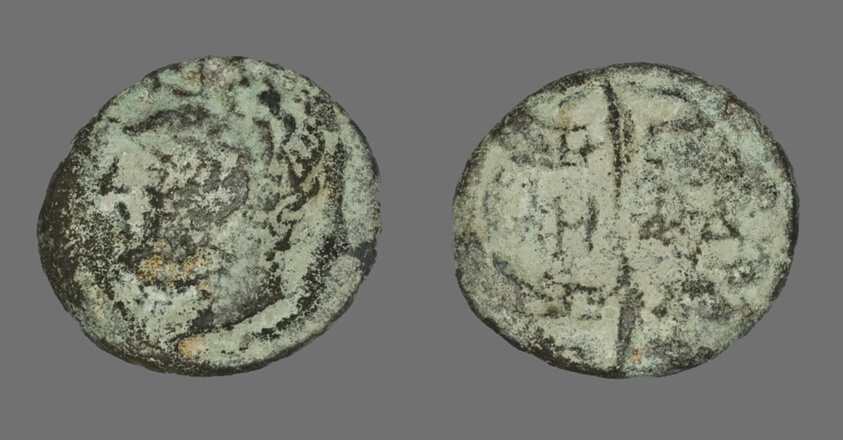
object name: Coin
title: Coin Depicting a Male Head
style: greek, ancient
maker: Greek, minted in Hephaistia, Lemnos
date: before 190 BCE (?)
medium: Bronze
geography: Ancient Greece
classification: coin; ancient art